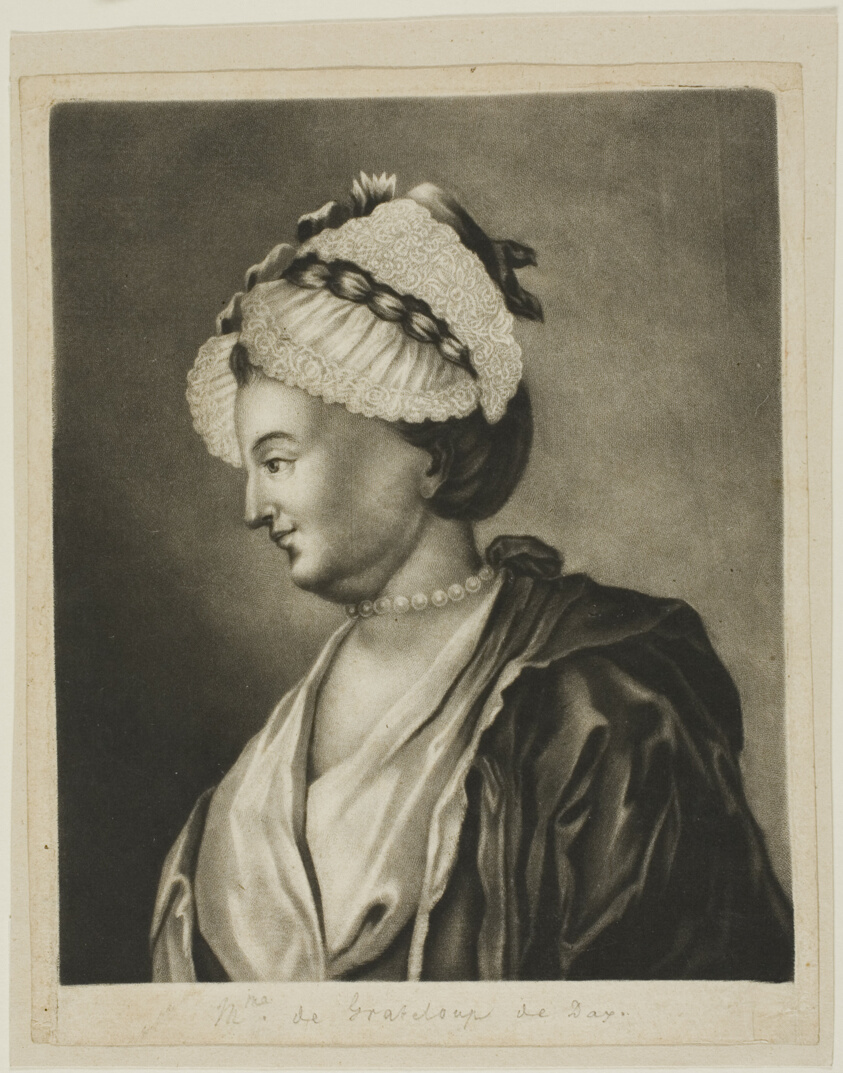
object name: Print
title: Mme. de Grateloup de Dax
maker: Jean-Baptiste de Grateloup (French, 1735-1817)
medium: Mezzotint on paper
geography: France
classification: mezzotint; print; prints and drawing